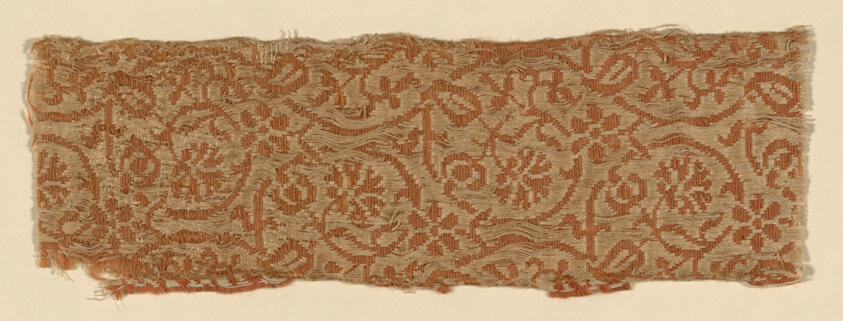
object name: Textile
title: Fragment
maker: Netherlands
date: Early 17th century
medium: Linen and wool, compound weave (ie. Beiderwand or Lampas 2:1)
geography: Netherlands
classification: textile; weaving